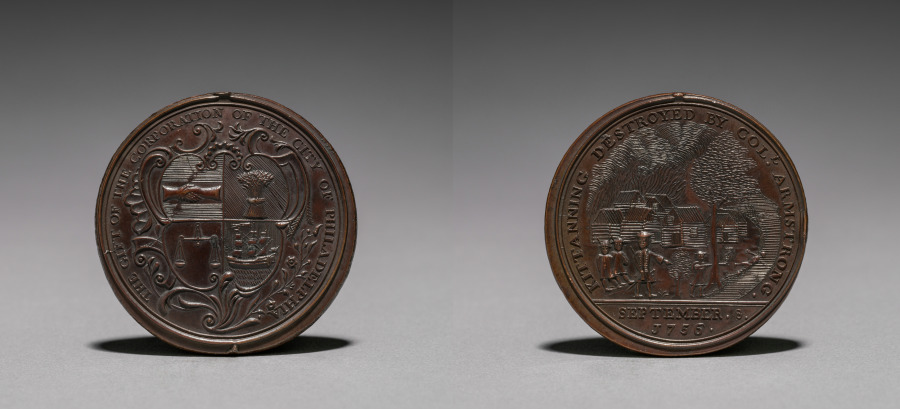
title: Medal: Commemorating the Destruction of Kittanning by Col. Armstrong, 8 September 1756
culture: America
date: 1756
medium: bronze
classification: Metalwork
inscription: The gift of the Corporation of the City of Philadelphia.